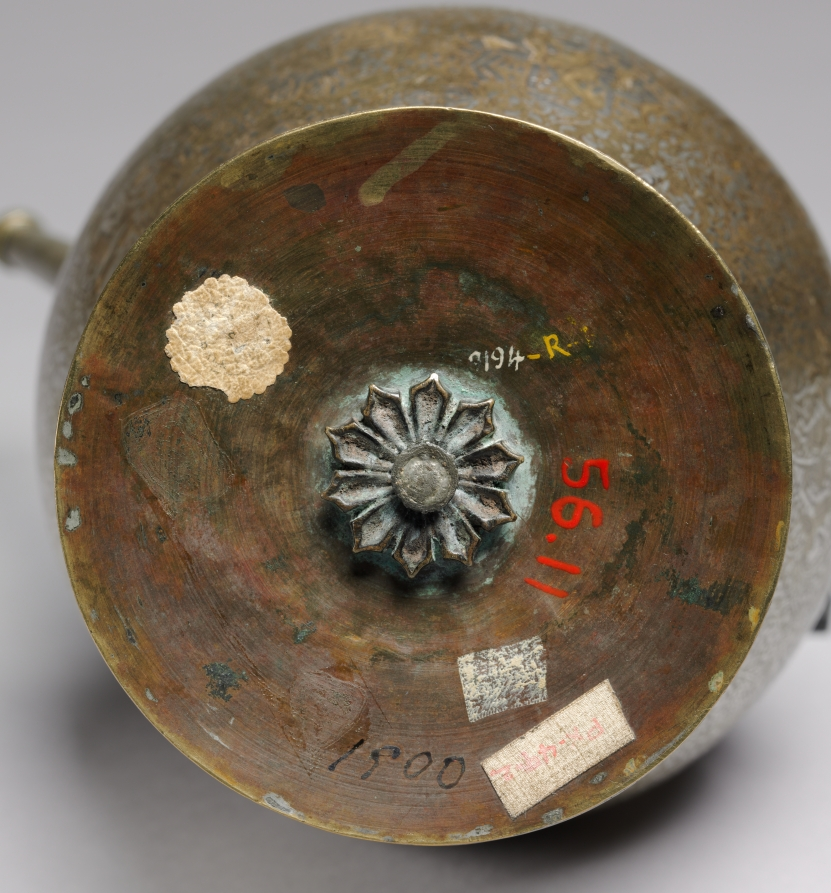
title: Luxury Ewer Extending Good Fortune to the Owner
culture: Iraq, possibly Mosul, Zangid or Artugid Period, 13th Century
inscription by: Ahmad al-Dhaki al-Mawsili (Iraqi, Mosul, active early 1200s?)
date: 1223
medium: brass inlaid with silver; lid and base added later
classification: Metalwork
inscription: Band on the neck (naskh): "Work of Ahmad al-Thaki, the engraver, al-Mawsili, in the year 620 and glory to my owner"; band at the base of the handle (naskh): "Work of Ahmad al-Thaki al-Mawsili"; graffiti of later owners, roughly scratched into the neck of the ewer: "Husayn ibn Qasim"; "Usta al-Muhtasib [?]"; band on the shoulder of the ewer (plaited, animated kufic): "Good luck, and learning, and commanding respect, and prosperity, and pride, and generosity, and faithfulness, and affection, and glory, and survival, and justice, and blessings, and exaltedness, and prosperity, and everlasting peace, and charitable giving."; band on the foot (naskh) [foot is a later addition]; this inscription has not yet been deciphered.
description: This silver inlaid ewer was produced for luxury clientele. The wide band around the body of the vessel displays vignettes of daily and courtly life contained within multilobed medallions. Some of the scenes feature falconry, hunting, dancing, and several groups of musicians. All these scenes are set off against a skillfully executed arabesque background—a pervasive motif in Islamic art characterized by interwoven vegetal and curvilinear elements. An inscription around the ewer’s shoulder extends good fortune, prosperity, and peace to the owner. The ewer is dated 1223 and signed by the master craftsman Ahmad al-Dhaki of Mosul.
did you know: Later owners roughly scratched their names into the neck of the ewer.